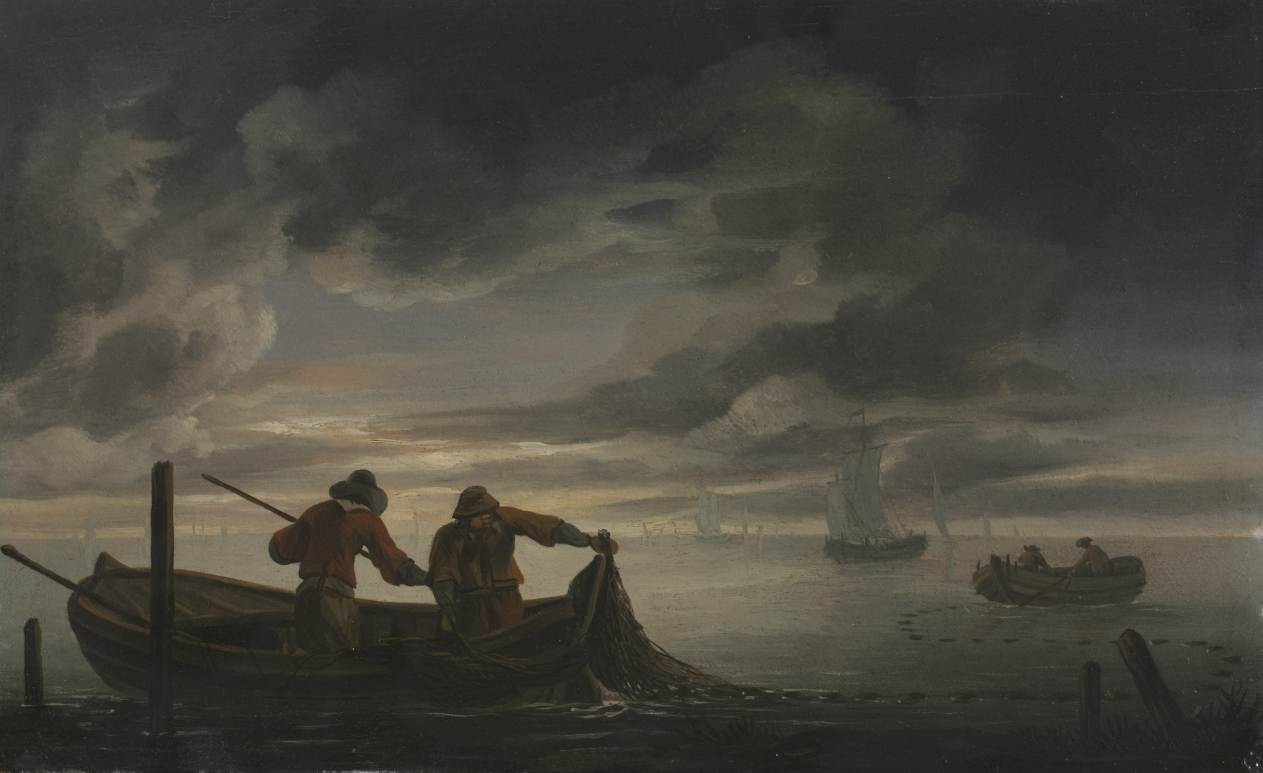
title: An Estuary Scene with Fisherman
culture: Netherlands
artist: attributed to Rafel Govertsz. Camphuysen (Dutch, 1597/98–1657)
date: 1625–50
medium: oil on wood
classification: Painting